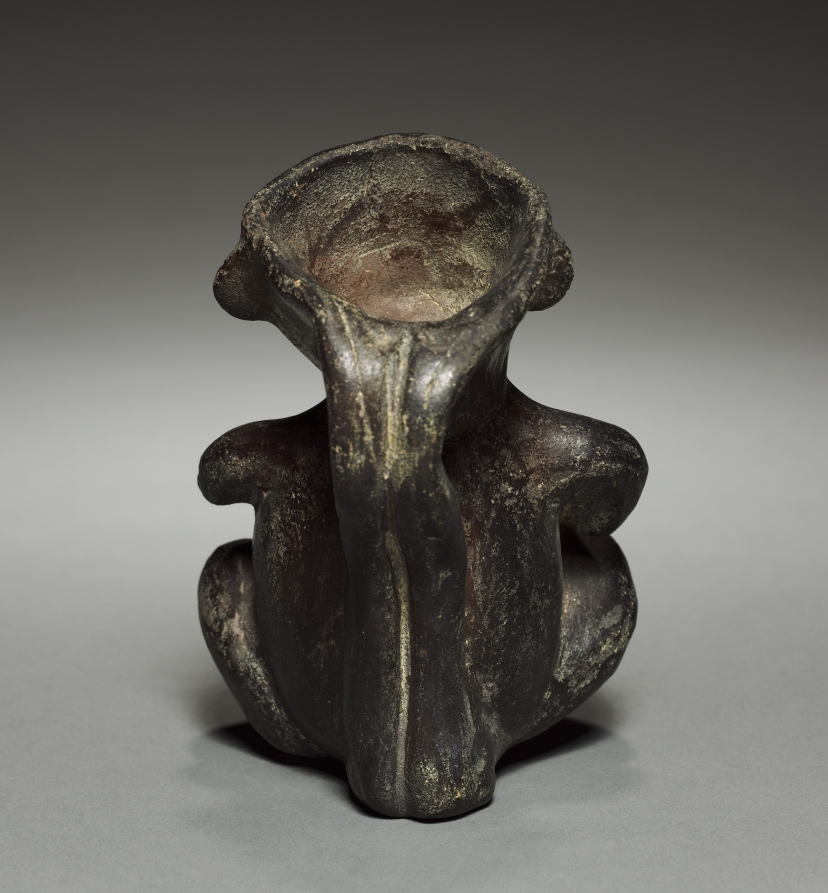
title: Seated Figure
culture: Colombia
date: before 1921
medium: pottery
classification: Ceramic